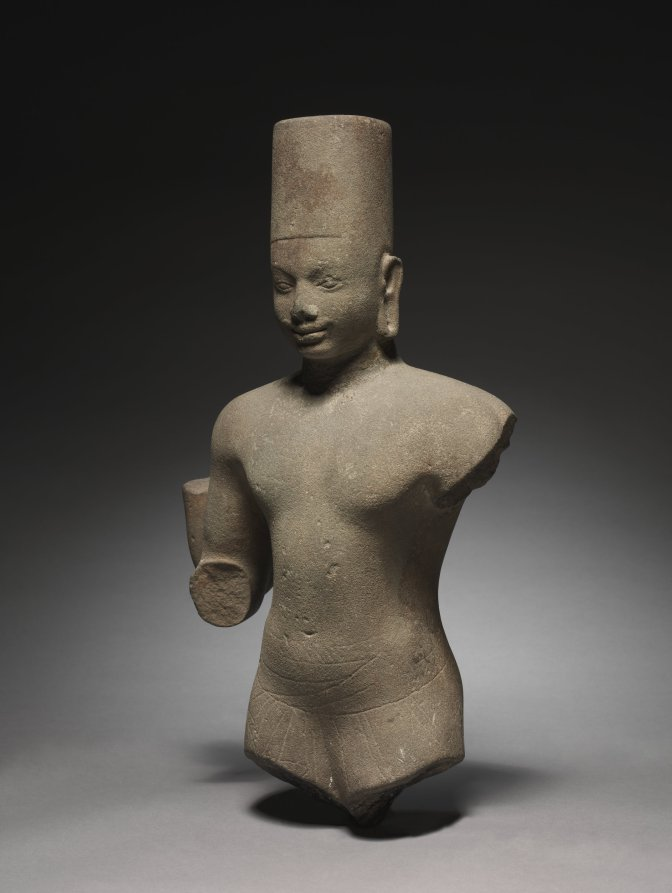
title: Vishnu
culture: Cambodia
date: 650–700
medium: sandstone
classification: Sculpture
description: Vishnu has the features of royalty, indicated by the high mitre-like crown with the flat top, distinctive to types made at the site of Prasat Andet. His status as a god, greater than any earthly king, is indicated by the four arms, traces of which are still visible. The sensitive rendering of the eyes and slight smile are characteristics of Cambodian sculpture, and during this early period, the form of the body reveals some relatively naturalistic musculature and treatment of the garments. He wears the Southeast Asian lower garment called sampot, around which his upper garment is loosely tied. It is Vishnu who incarnates himself into the world in avatars, including Krishna and the boar Varaha. Here we see his iconic form as Vishnu himself.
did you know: The deity is four-armed with the arms running parallel from the shoulders and then bifurcating at the elbows.